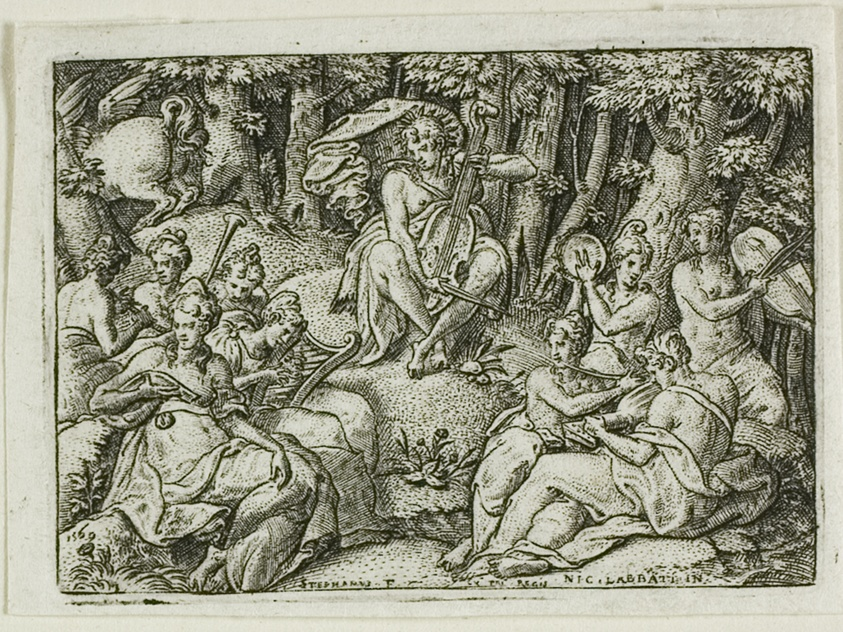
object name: Print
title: Apollo and the Muses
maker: Etienne Delaune; French, c. 1519-1583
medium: Engraving on paper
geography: France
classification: engraving; print; prints and drawing